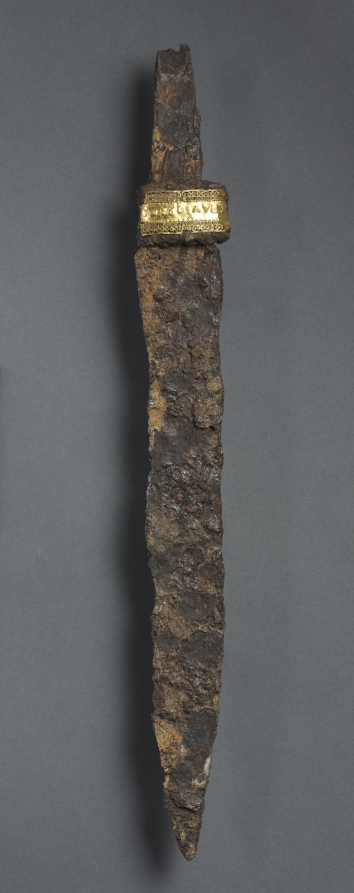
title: Single-Edged Knife (Scramasax)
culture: Frankish, Champagne(?), Migration period, 7th century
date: 600s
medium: iron, copper, and gold foil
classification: Arms and Armor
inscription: guard decorated with two bands of gold filigree between which is a thin band of plain gold with an embossed inscription.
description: The scramasax, a single-edged knife, was a general purpose implement. It could serve equally well as a tool or as a weapon and generally did not exceed 12 inches in length. As with most objects of the Migration period, iron weapons survive as excavated grave goods and tend to be heavily corroded. The grips, now missing, were probably fashioned from wood or bone and silver inlay decorated the pommels (the knob on the hilt, or handle). The ornamental gold foil bands, perhaps from the original scabbards (the cases in which the blades of swords or daggers are kept) have survived relatively intact.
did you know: Known as a scramasax, seax means knife in Old English.